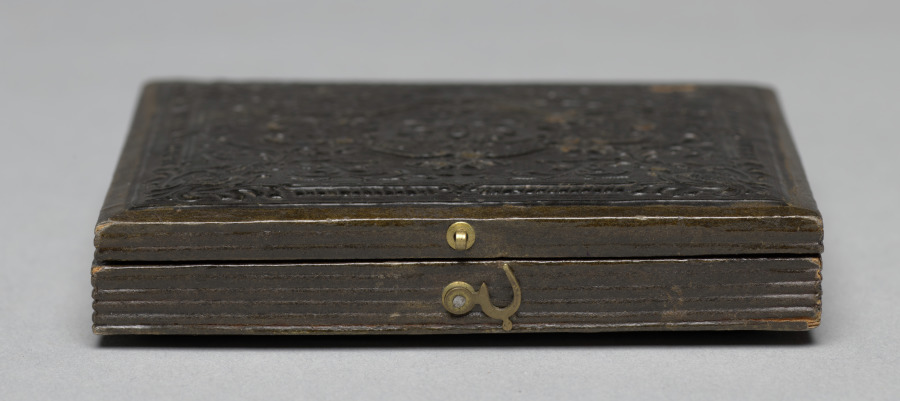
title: High Rock Tower and Stone Cottage, Lynn, Massachusetts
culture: America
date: c. 1862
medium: ambrotype, sixth plate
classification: Photograph